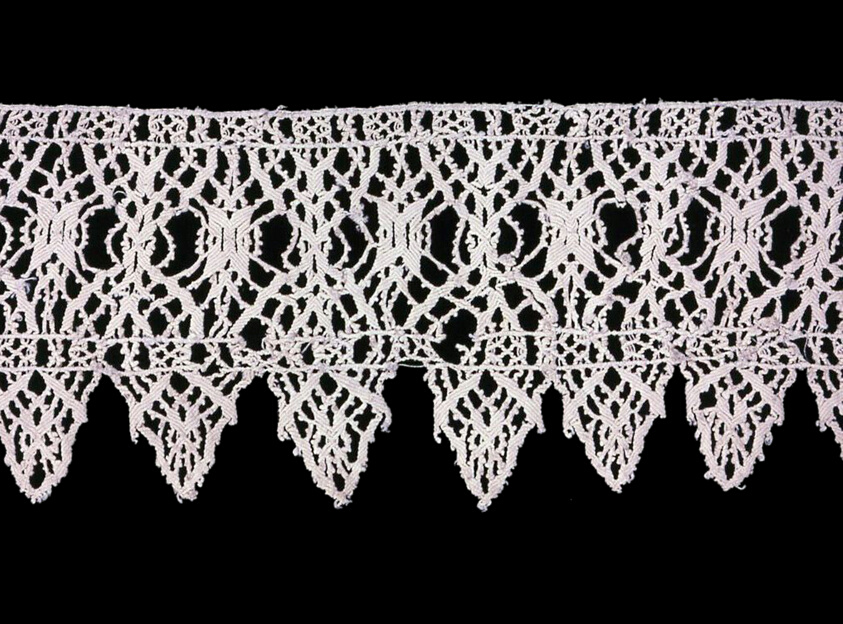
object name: Textile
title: Border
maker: Italy or Spain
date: 1575/1625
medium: Linen, macramé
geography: Italy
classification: textile; needlework (visual works)